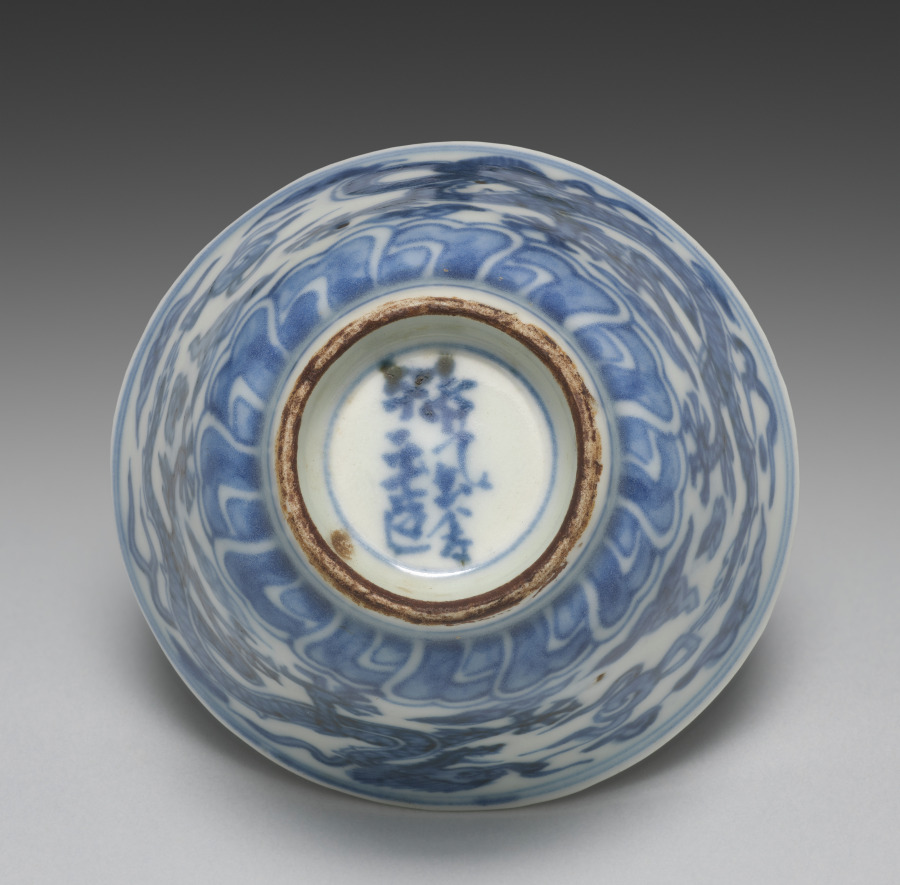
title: Cup from Tea Cups with Dragons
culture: Japan, Edo period (1615–1868)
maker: Seifū Yohei I (Japanese, 1801–1861)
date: 1840s–57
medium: One from a set of five tea cups; porcelain with underglaze blue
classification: Ceramic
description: Seifū Yohei I made both blue and white porcelains after Ming dynasty (1368–1644) Chinese wares fired in the kilns at Jingdezhen for export. He also made colorful stoneware in the style of his teacher, Nin’ami Dōhachi (Takahashi Dōhachi II) (1783–1855).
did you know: A small figure of an elephant serves as the handle for the lid.